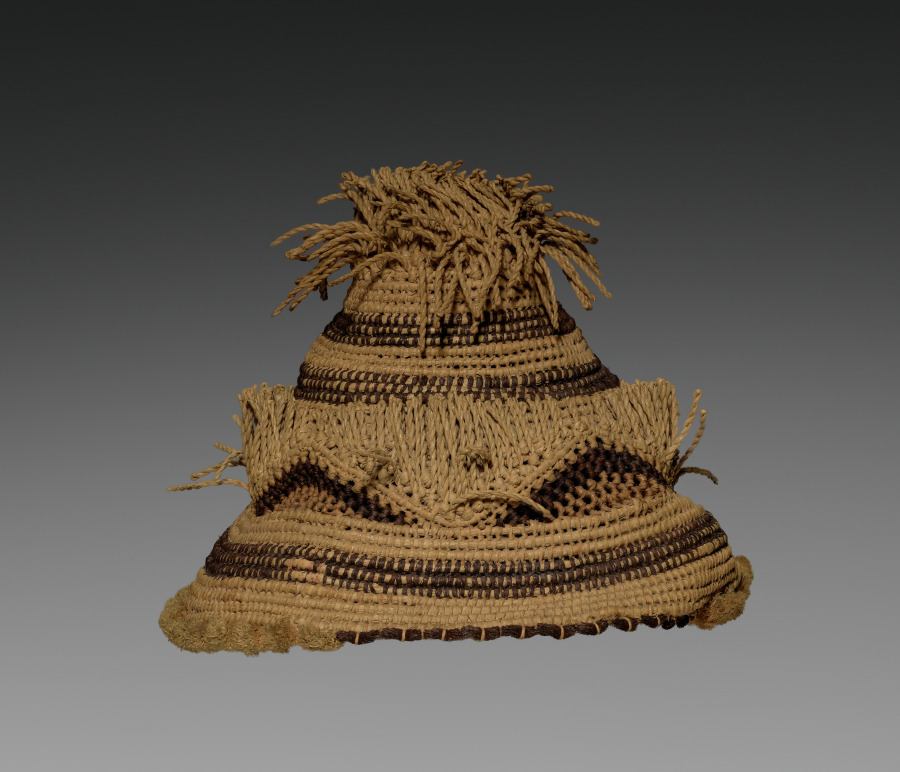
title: Hat with Pin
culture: Africa, Central Africa, Democratic Republic of the Congo, Kuba-style maker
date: early 1900s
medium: Raffia and dye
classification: Garment